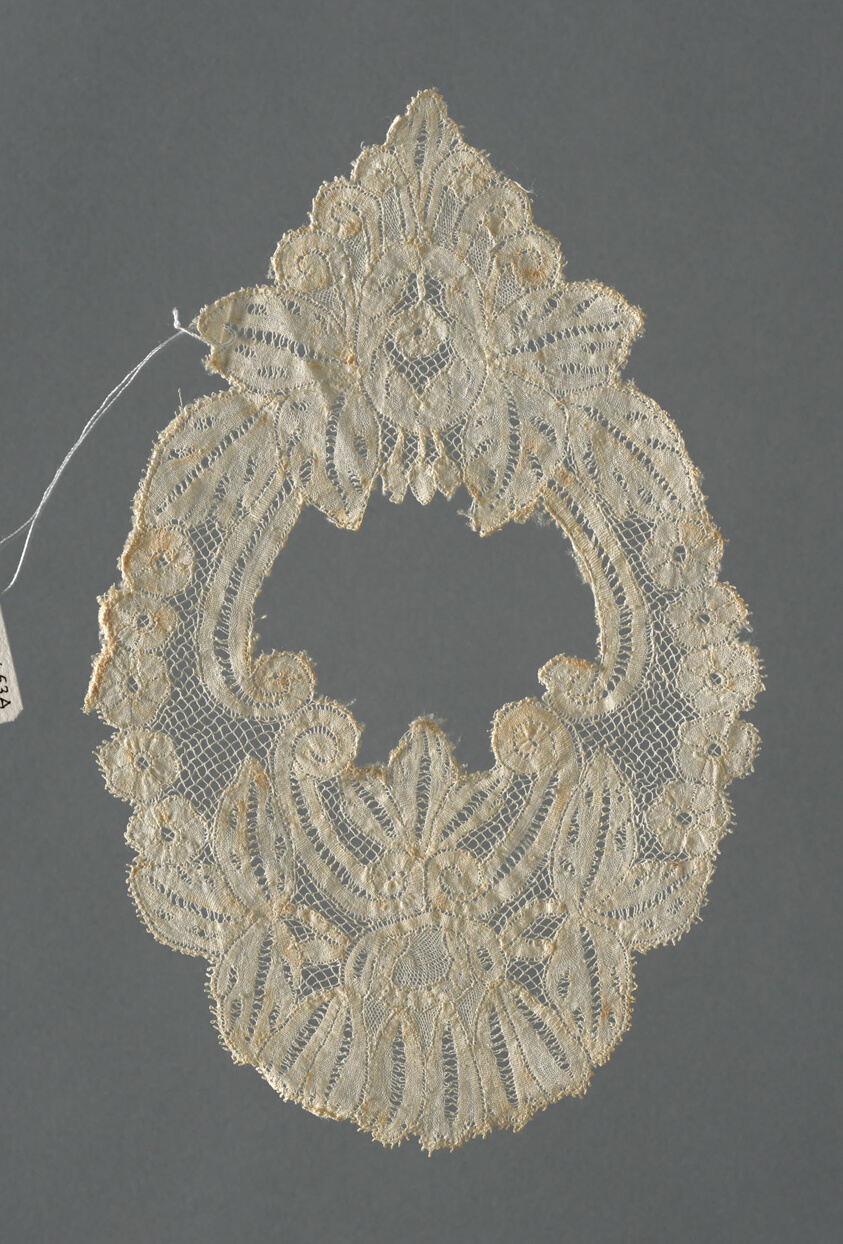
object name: Textile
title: Medallion Insert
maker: Belgium, possibly Ghent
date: 1850/75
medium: Cotton, bobbin part lace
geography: Belgium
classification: textile; lace - bobbin